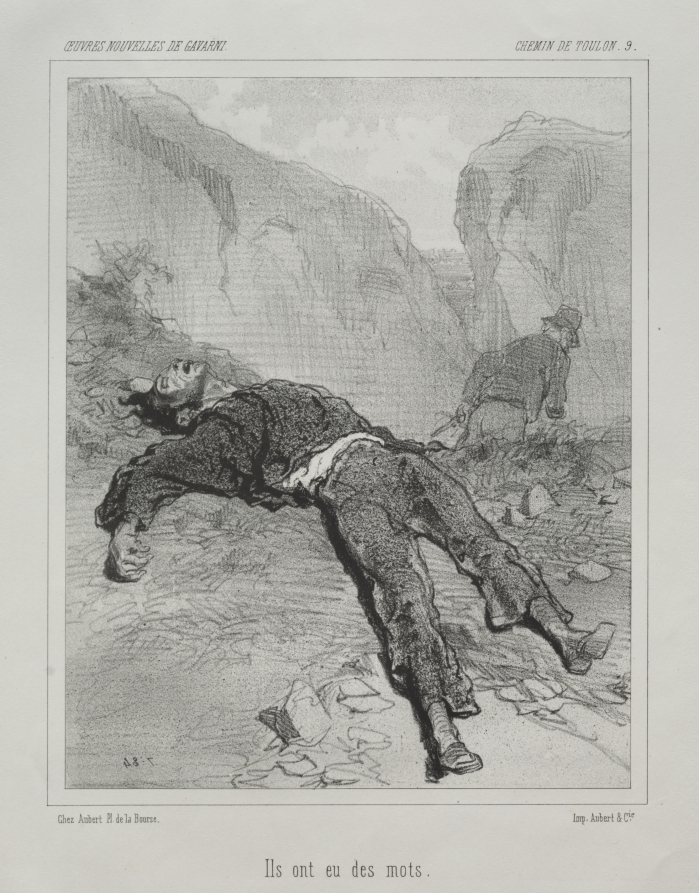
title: Chemin de Toulon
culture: France, 19th century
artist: Paul Gavarni (French, 1804–1866)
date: c. 1846–47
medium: lithograph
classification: Print